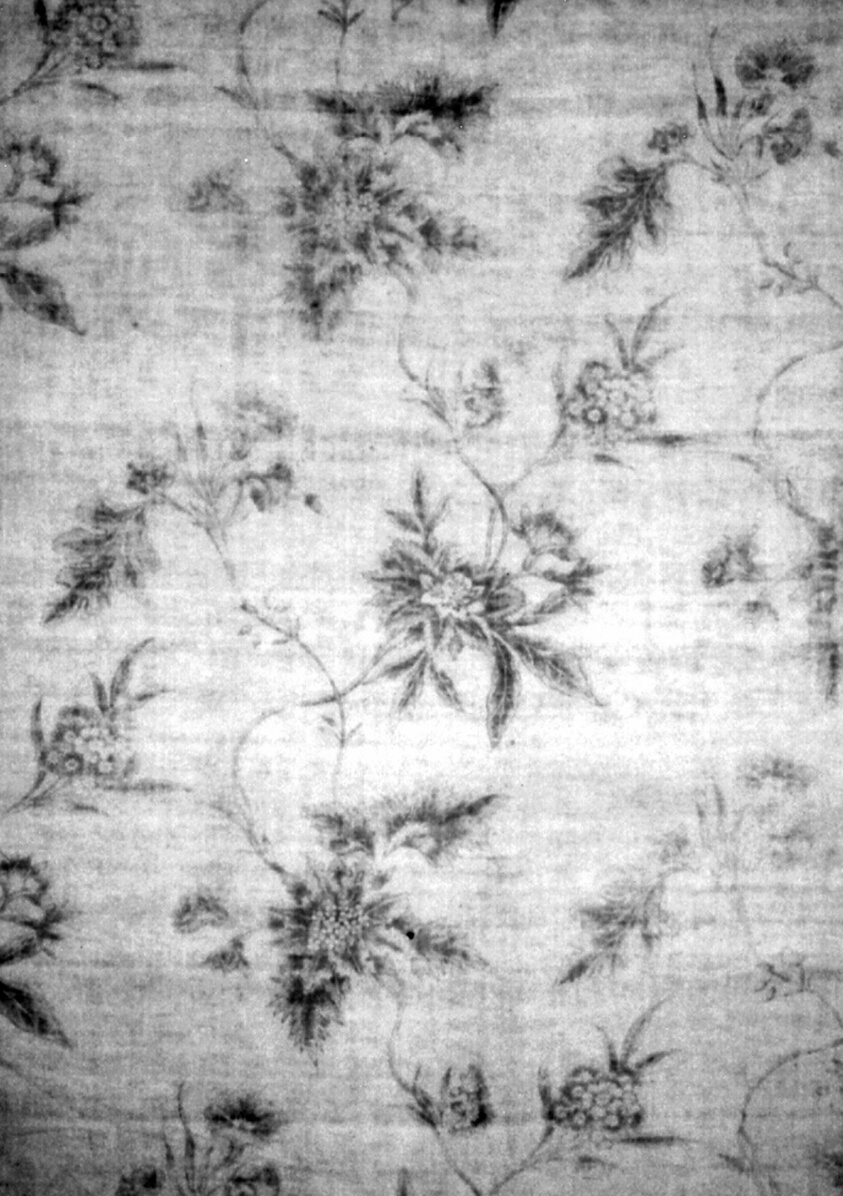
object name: Textile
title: Panel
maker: England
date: c. 1780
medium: Cotton, plain weave; copperplate printed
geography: England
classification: textile; weaving - printed